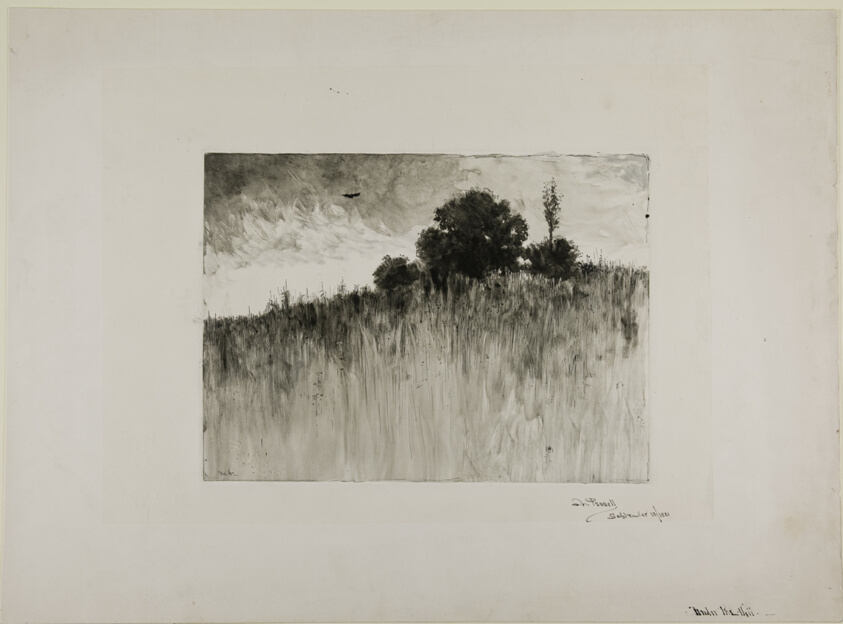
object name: Print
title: Under the Hill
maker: Joseph Pennell (American, 1857-1926)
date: 1881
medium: Monotype with pen in black ink on cream China paper laid down on cream wove paper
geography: United States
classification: monotype; print; prints and drawing